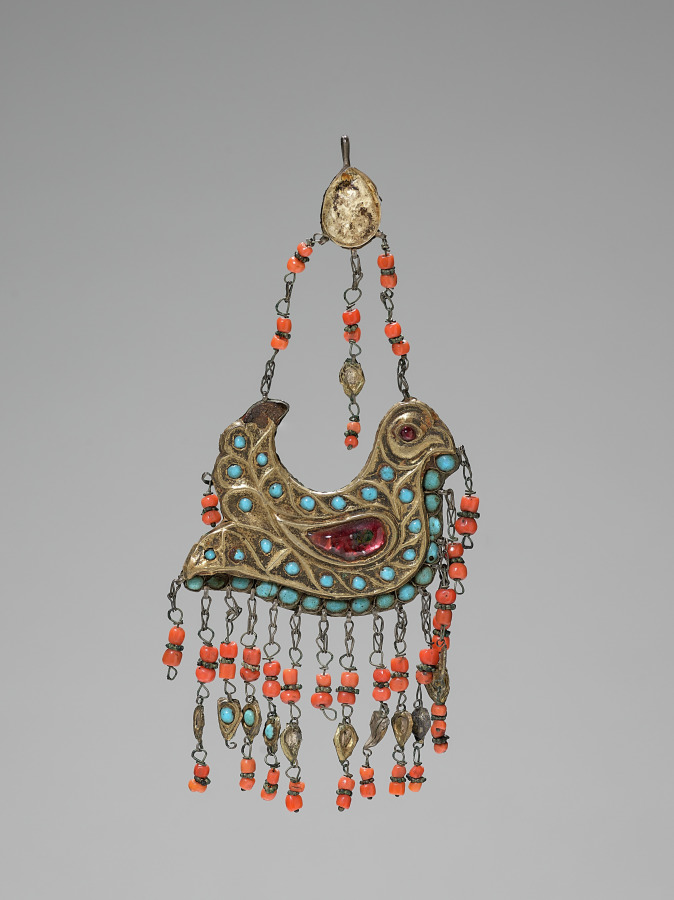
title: Pendant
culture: India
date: 1800s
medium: silver gilt with turquoise and coral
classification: Jewelry